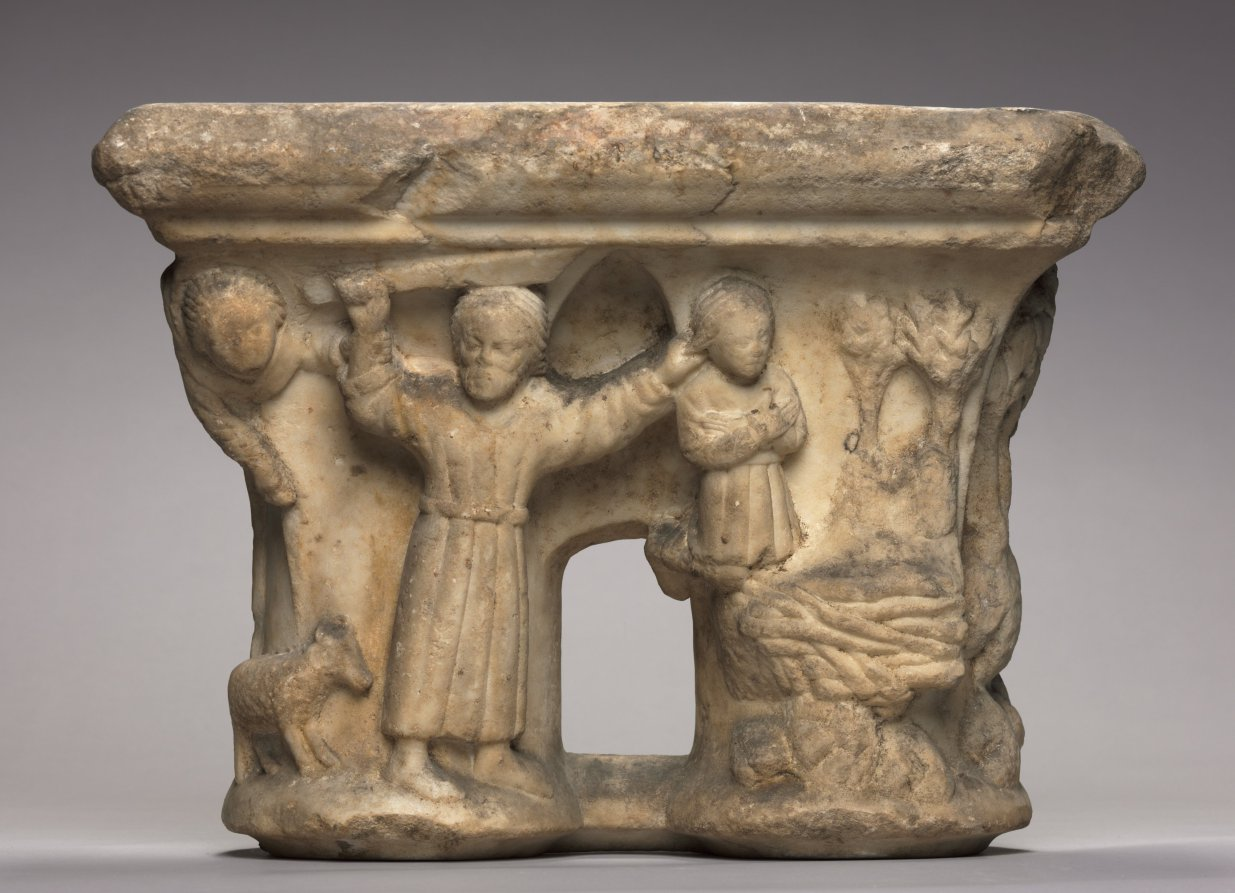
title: Engaged Capital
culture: Southern France, Abbey of Larreule, near Tarbes, 15th century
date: 1400s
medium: limestone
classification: Sculpture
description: This capital belongs to a surviving group including other architectural fragments that once decorated the cloister of the Abbey of Larreule. A cloister was a covered walkway or arcade, usually around all four sides of a square area of grass (the "cloister garth"). The seclusion of the cloister was the monks’ exclusive domain, off limits to others. Here, the monks were supposed to pray, study, meditate, and exercise in privacy and solitude. Such cloister capitals served both to instruct the monks and as a focus for their devotions. Other capitals in this series are installed in the Jardin Massey at Tarbes, near the original abbey. An arch from Larreule has been assembled with other associated French capitals at The Cloisters in New York.